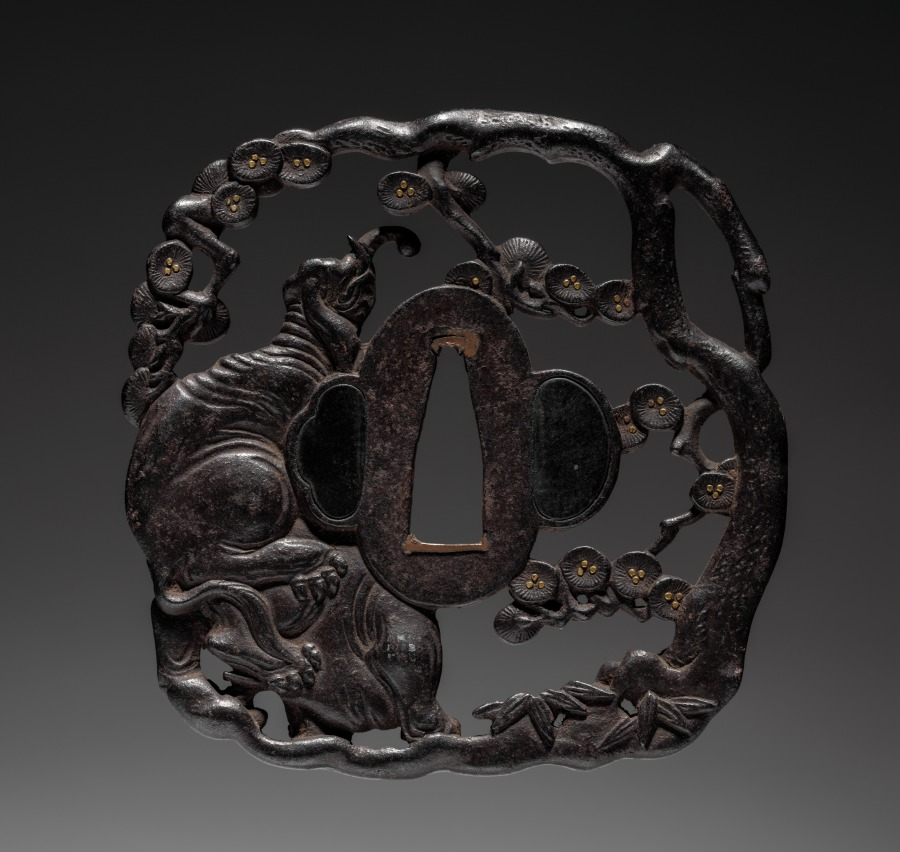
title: Sword Guard (Tsuba) with Elephant in Pine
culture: Japan, Edo period (1615–1868)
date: c. 1800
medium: iron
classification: Arms and Armor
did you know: This sword guard may have been made by the Soten school.